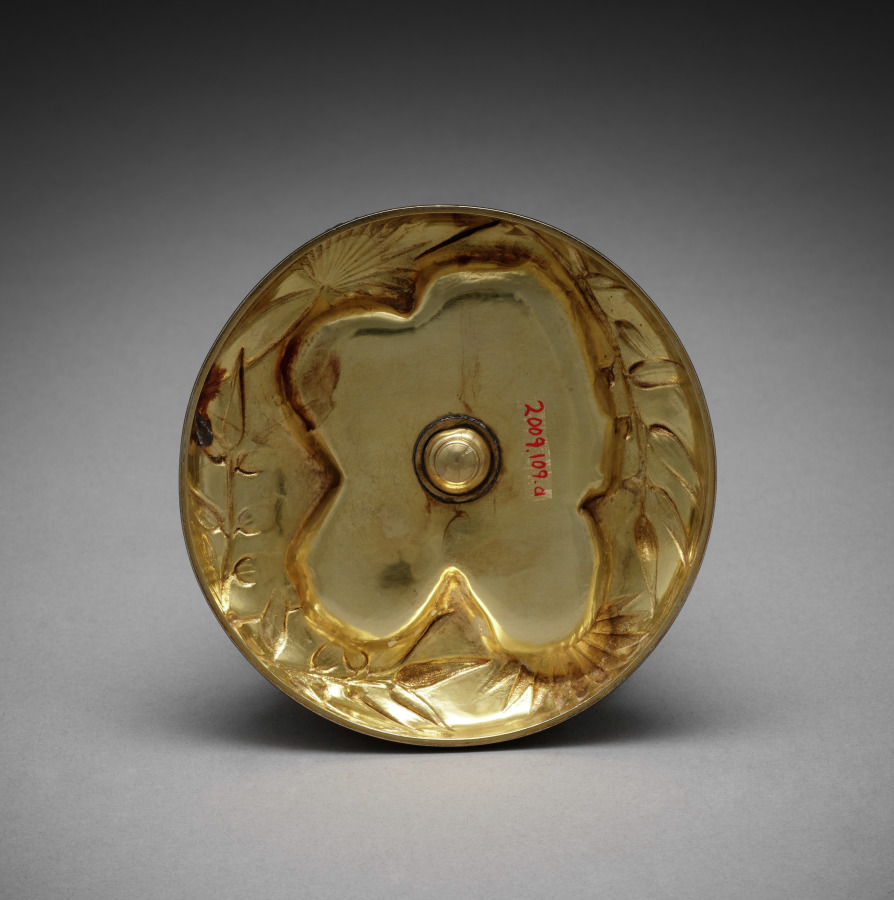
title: Monkey Figure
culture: Sweden, 19th century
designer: Ingeborg Plockross-Iminger (Danish, 1872–1962)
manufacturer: Bing & Grøndahl (Danish, est. 1853)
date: c. 1850–1900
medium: porcelain, silver-gilt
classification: Sculpture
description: This figure featuring three monkeys was designed by the Danish ceramicist Ingeborg Plockross-Iminger. The figure is displayed with a French silver mount that references Japonisme and Art Nouveau styles that were popular at the end of the 1800s and experienced a resurgence in the 1920s because of increased importation of Japanese goods to the West.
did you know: This ceramic figure usually stands alone, without a silver mounting.